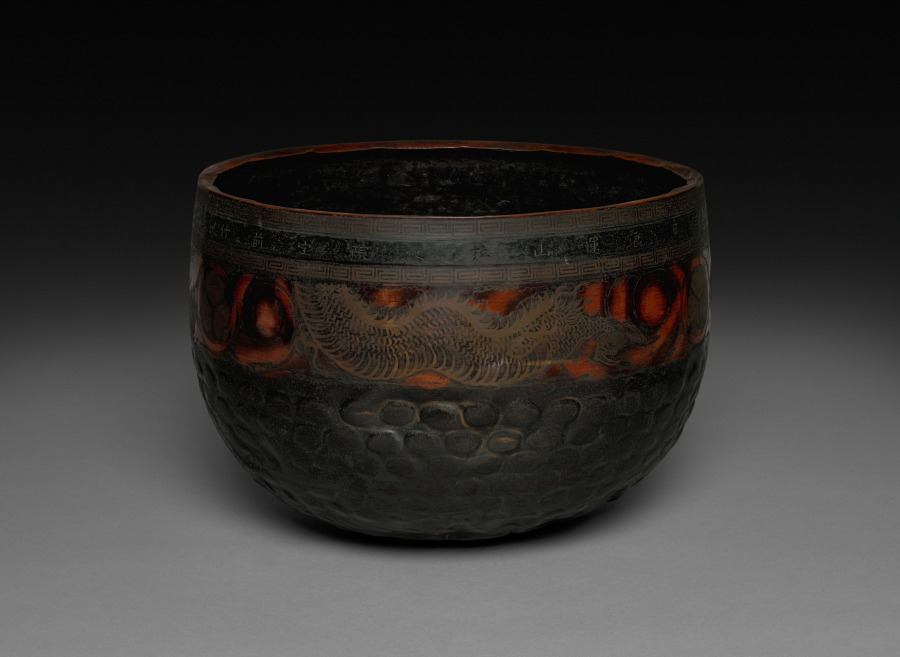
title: Gong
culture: Japan, Edo period (1615–1868)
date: early to mid-1800s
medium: bronze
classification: Metalwork